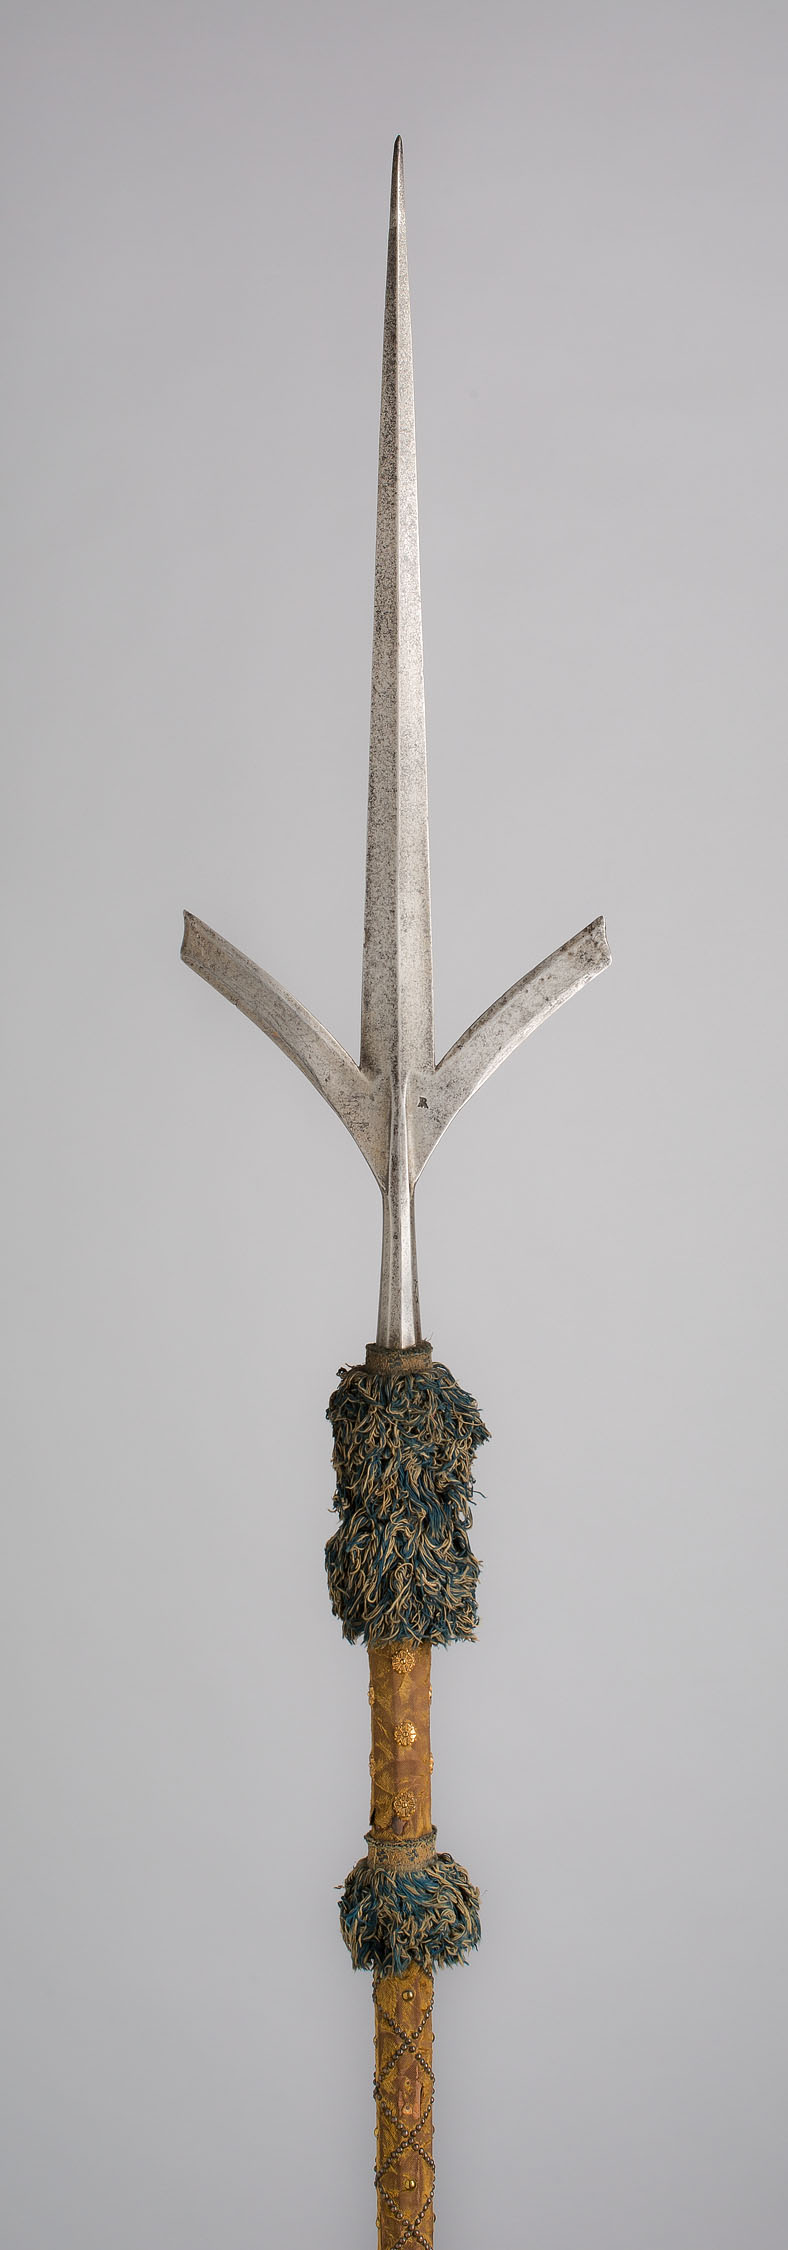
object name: Arms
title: Friuli Spear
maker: Italian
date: 1540/60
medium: Steel, wood (pine), velvet, brass nails, tassels, and gilded rosaces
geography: Italy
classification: edged weapon-staff; arms; arms and armor